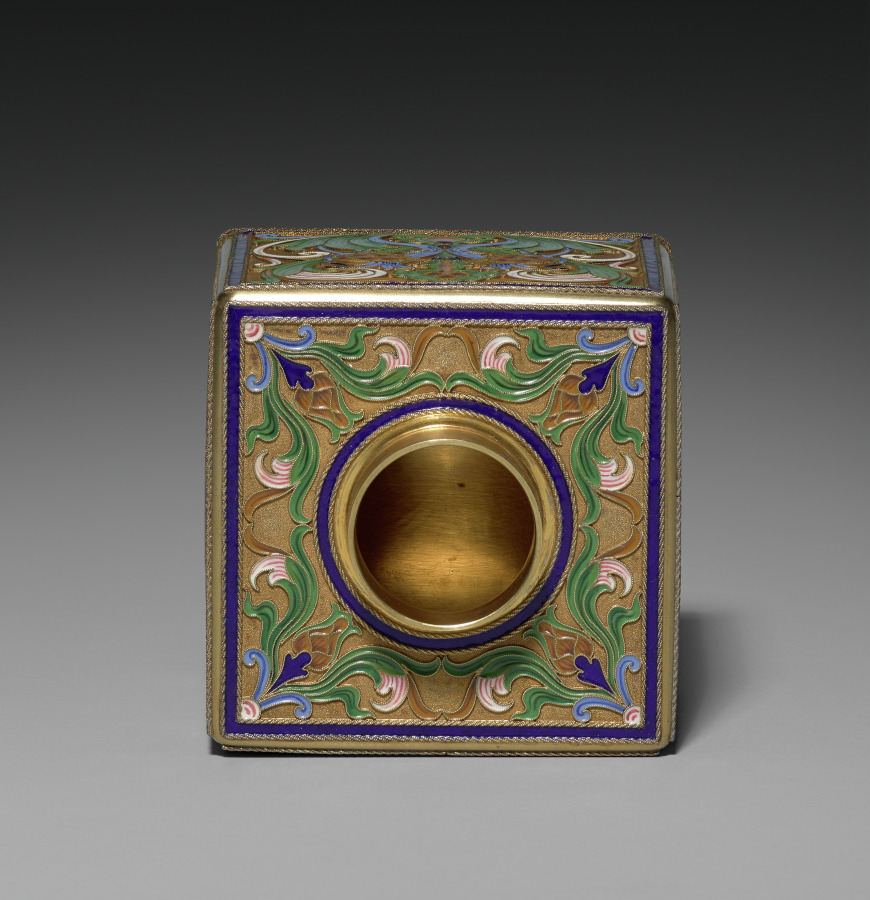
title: Tea Caddy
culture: Russia, St. Petersburg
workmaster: attributed to Feodor Ivanovich Rückert (Russian, 1840–1917)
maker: House of Fabergé (Russian, 1842–1918)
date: 1896–1906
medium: silver gilt, opaque cloisonné enamel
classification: Miscellaneous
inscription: 88, Kokoshnik, tester's initials [assay mark for Moscow, 1899-1908]; C. Fabergé (in Cyrillic); double-headed eagle [imperial warrant]; 88.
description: Fabergé’s craftsmen in Moscow, especially under the watchful eye of workmaster Feodor Rückert, became known for their work in the pan-Slavic or neo-Russian style, hearkening back to 17th-century motifs of Russian folk art. Often on rather conventional shapes, Rückert and his silversmiths created an explosion of color, achieved through the historic technique of cloisonné enamel in which tiny metal lines are soldered to the surface then filled with glass powders in various colors and fired to create a high gloss finish. The result is a spectacular evocation of the 17th-century originals. Far from mere copies, however, Rückert's designs, such as this tea service, employ naturalistic or abstract motifs in a thoroughly modern adaptation of a remarkable earlier period of Russian art and decoration.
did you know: This tea caddy is part of a larger tea service.